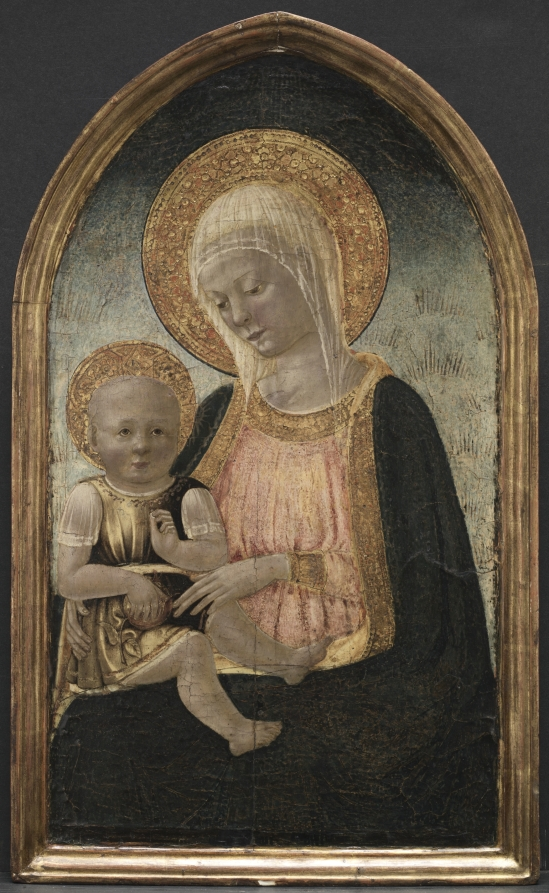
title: Virgin and Child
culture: Italy, 15th century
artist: Neri di Bicci (Italian, 1419–1491)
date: c. 1460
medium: tempera on wood panel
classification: Painting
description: Neri de Bicci was a prolific painter of mainly religious themes, active principally in Florence as a panel painter. His grandfather Lorenzo di Bicci was also a painter in Florence, a pupil of Spinello Aretino. His journals from the years 1453-75, including the rates of remuneration for his work, are still preserved in the library of the Uffizi Gallery in Florence.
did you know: When cleaned in 1947, a modern hedge with orange trees was removed from the background of this painting.